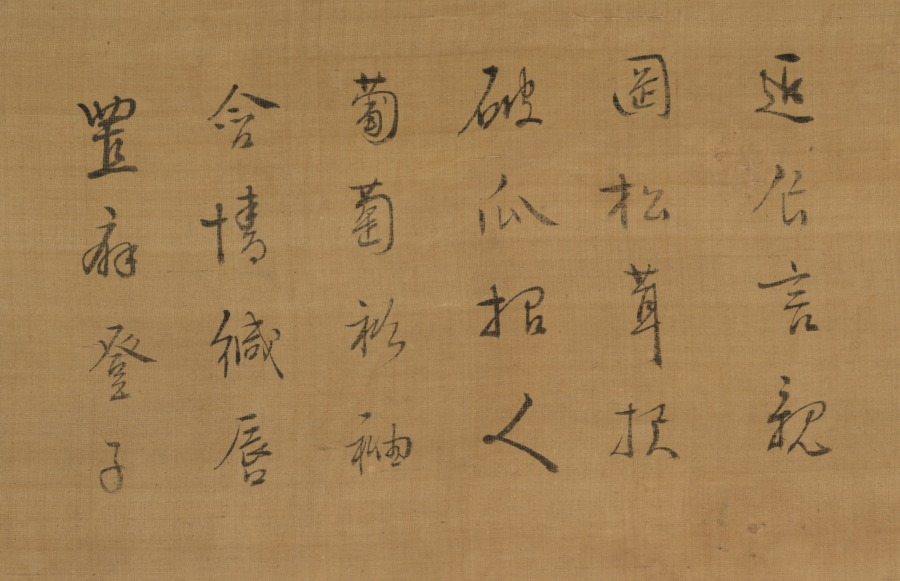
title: Courtesan Seated on a Bench Enjoying the Evening Cool in Summer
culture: Japan, Edo period (1615–1868)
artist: Kamigaki Hōryū (Japanese, dates unknown)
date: 1615–1868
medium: hanging scroll, ink and color on silk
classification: Painting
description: In a pensive pose with her chin resting in her hand, a courtesan is seated on a wooden bench that extends diagonally across the lower half of the scroll. Her open robe suggests that it is a warm evening-perhaps late summer or early fall, as indicated by the grapevine pattern on her kimono. The floral patterns in the composition hint at the seasons: the plum blossom on the fan for spring; grape pattern on the robe for late summer; and chrysanthemum design on the bench indicating autumn. Note also how the grapevine pattern in the painting's mounting mimics the design of her kimono. The overall mood is one of intimacy, created by Hõryþ through the delicate rendering of the courtesan's facial features and hands. In contrast to the other scrolls of beauties nearby, the artist here portrayed his subject with little background, allowing her grace and elegance to carry the picture.